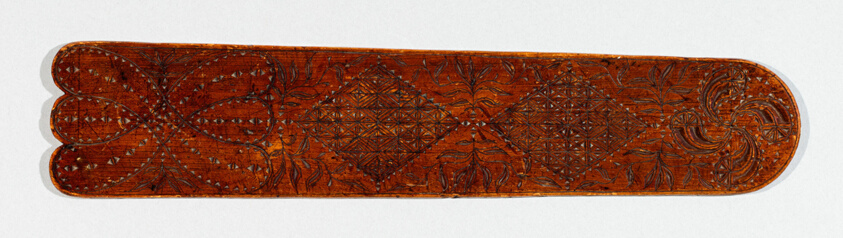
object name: Decorative Arts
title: Busk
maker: Artist unknown (American, active 18th–19th century); Pennsylvania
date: c. 1800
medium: Wood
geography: Pennsylvania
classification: sculpture; american decorative arts; decorative arts